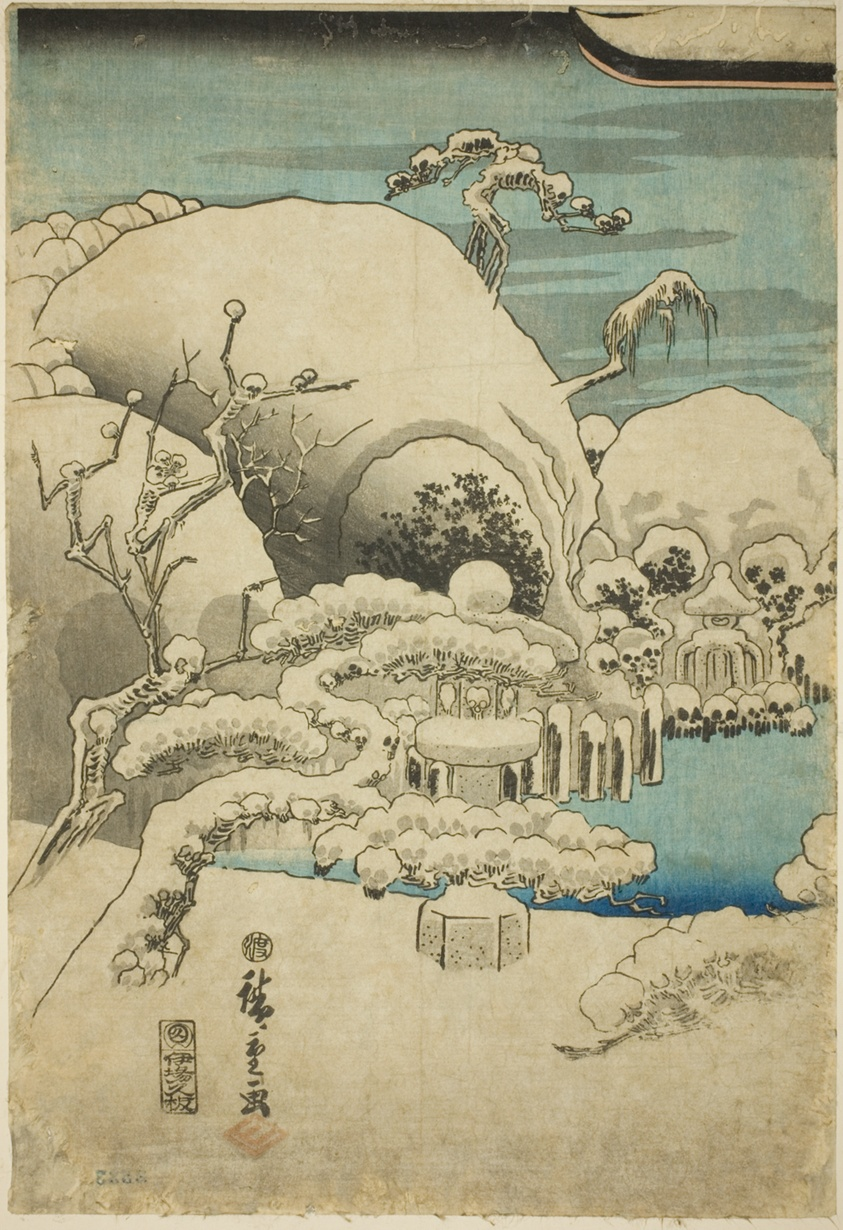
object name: Print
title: Taira no Kiyomori Sees an Apparition (Taira no Kiyomori kaii o miru zu)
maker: Utagawa Hiroshige 歌川 広重; Japanese, 1797-1858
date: c. 1843/47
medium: Color woodblock print; left sheet of oban triptych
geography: Japan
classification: woodblock print; print; asian art